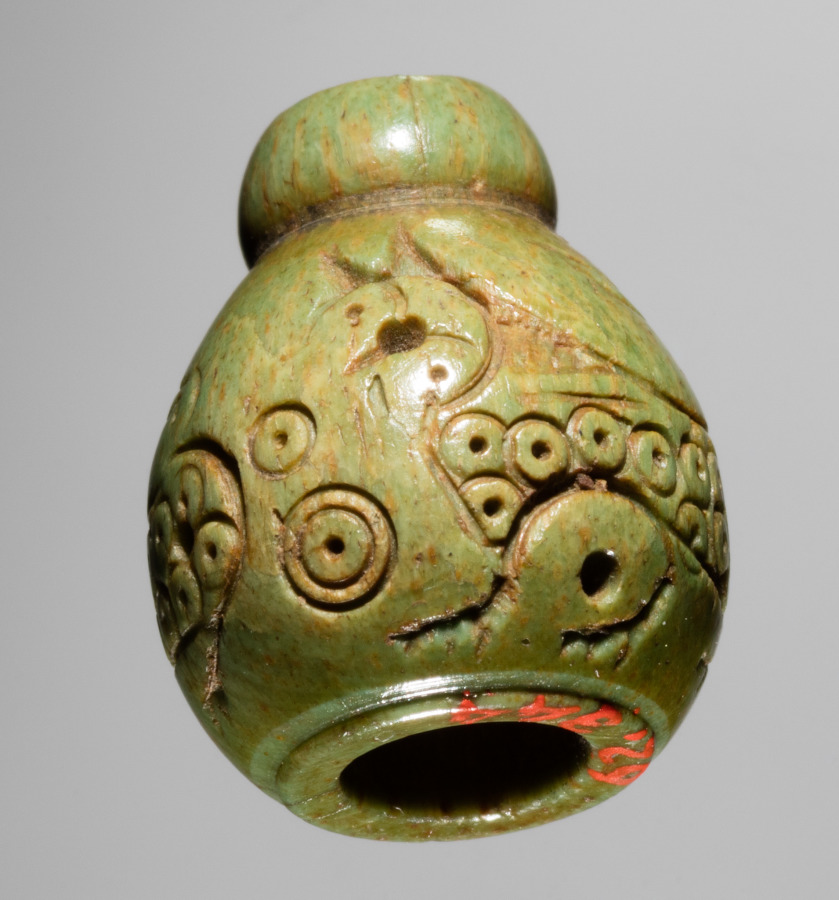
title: Spindle Whorl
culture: Iran, early Islamic period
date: 700s - 900s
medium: bone, incised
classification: Spindle Whorl